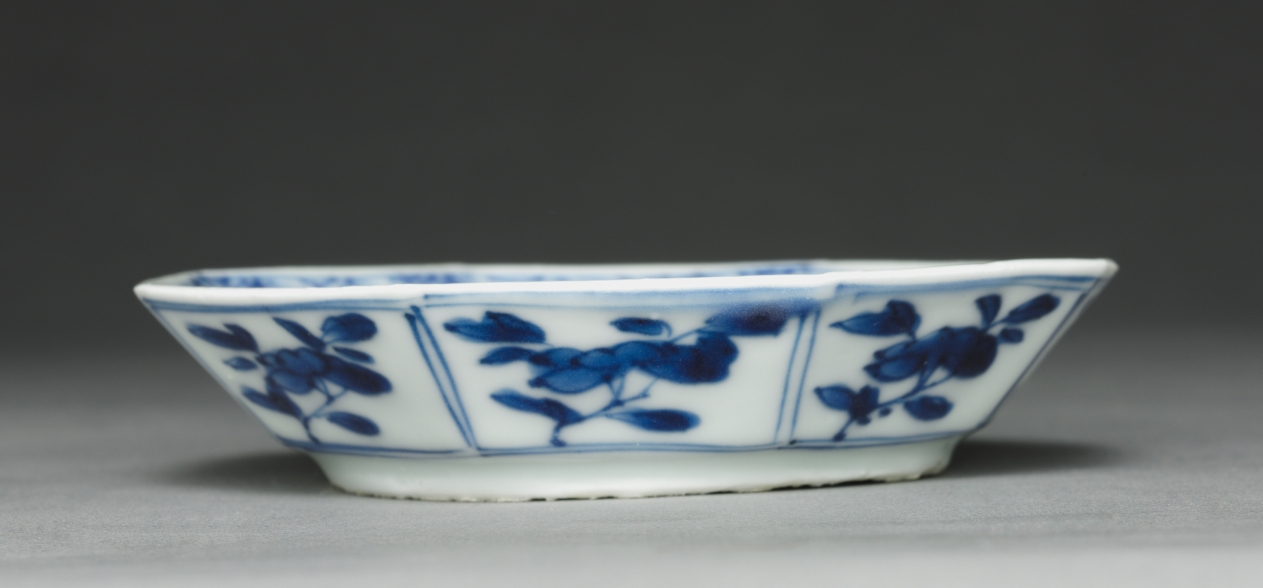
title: Saucer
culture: China, Qing dynasty (1644-1911)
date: c. 1690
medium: porcelain with blue and white decoration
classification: Ceramic